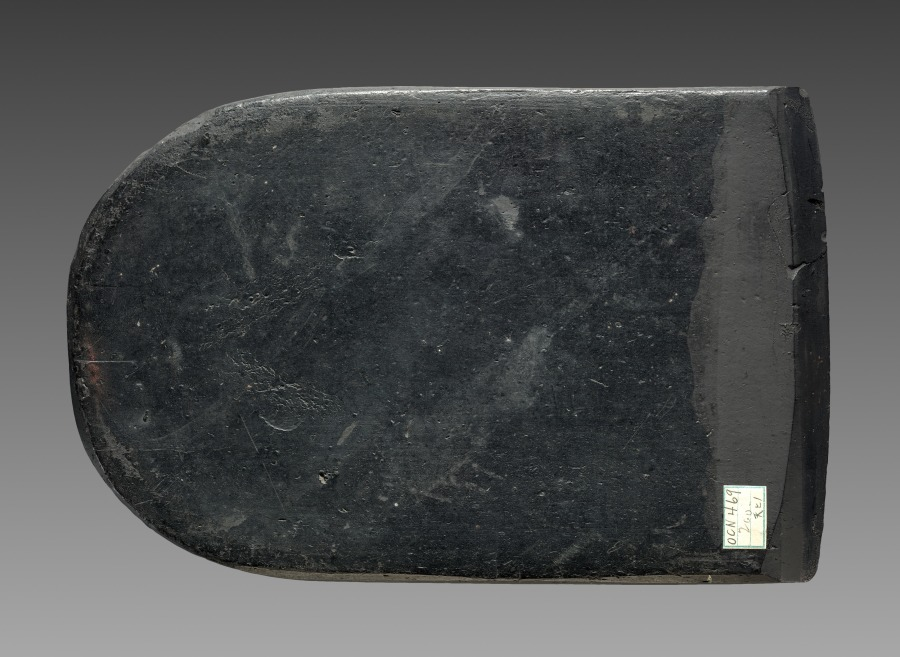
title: Ink Cake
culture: China, Ming dynasty (1368–1644)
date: 1368–1644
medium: ink cake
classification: Miscellaneous